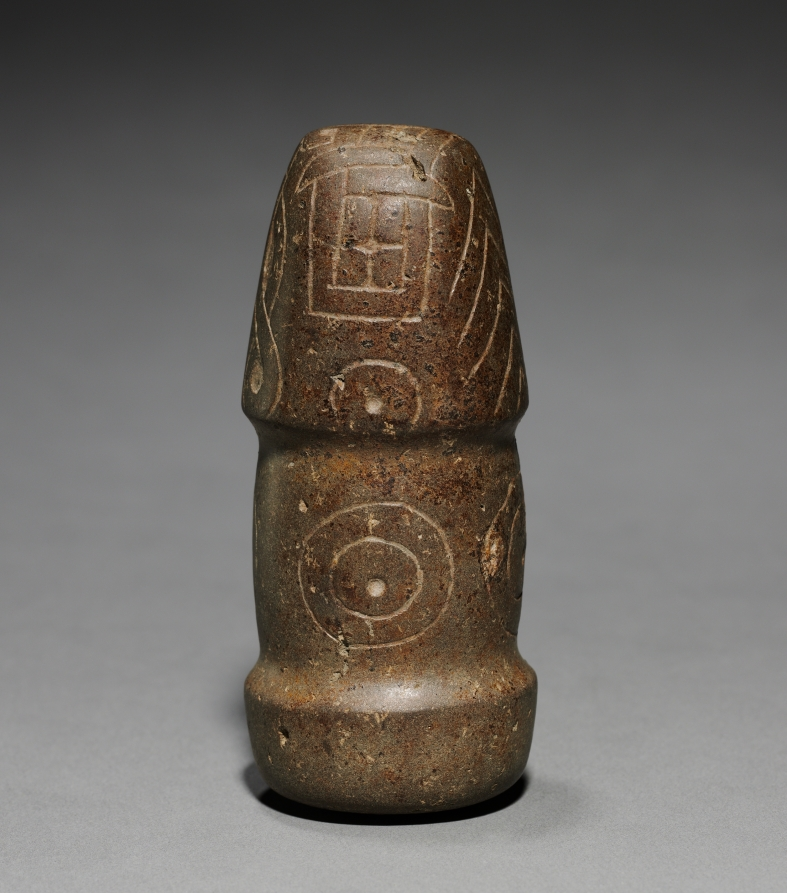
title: Pestle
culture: Peru, North Highlands, Pacopampa(?), Chavín style (900-200 BCE)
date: 700–1 BCE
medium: stone, pigment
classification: Stone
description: Size suggests that this Chavín-style pestle was not used to grind bulky staples like corn, but instead pigments or plant hallucinogens used in religious rites to achieve spiritual insight and communion with cosmic forces. This may come from Pacopampa, a site in the northern highlands where elites adopted Chavín deities and worshiped them alongside local deities. These small sculptures illustrate the appeal and the spread of Chavín religion.